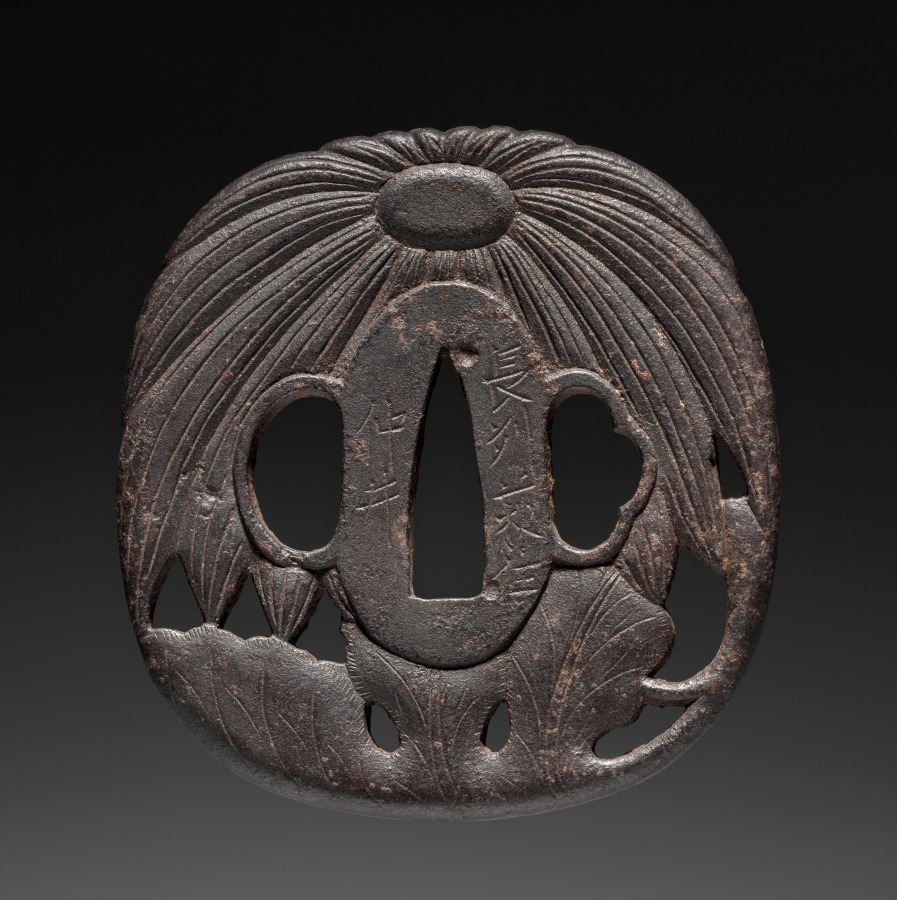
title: Sword Guard (Tsuba) with Chrysanthemum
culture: Japan, Edo period (1615–1868)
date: 1615–1868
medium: iron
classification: Arms and Armor